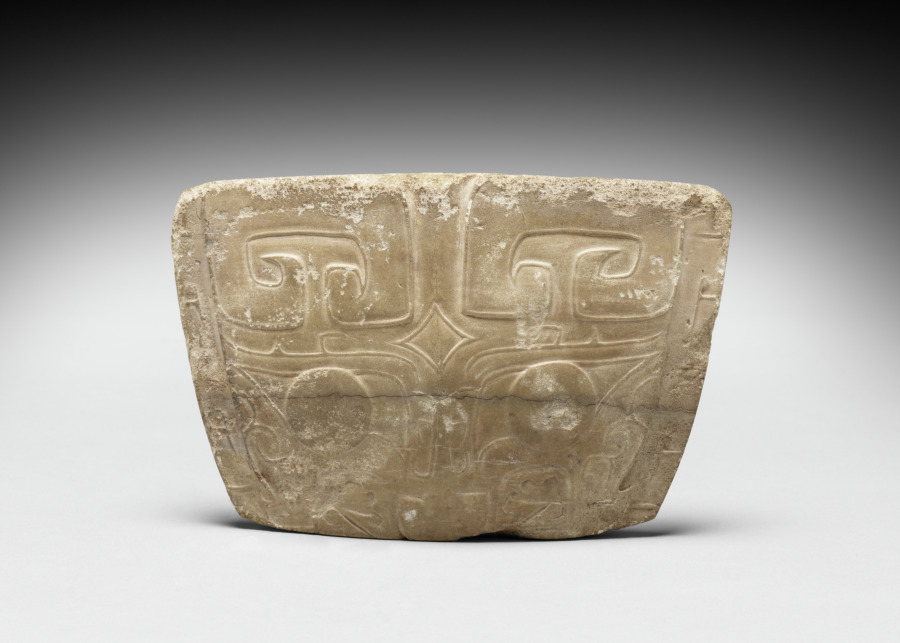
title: Taotie (Ogre Mask)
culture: China, Shang dynasty (c. 1600–c. 1046 BCE)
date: c. 1200–1050 BCE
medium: marble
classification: Sculpture